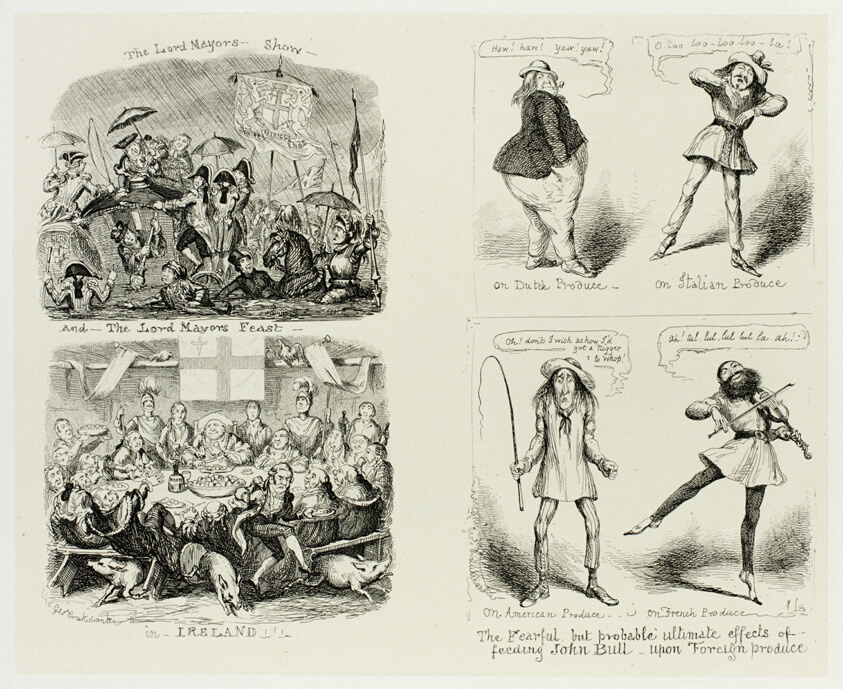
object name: Print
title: The Lord Mayors Show and the Lord Mayors Feast in Ireland from George Cruikshank's Steel Etchings to The Comic Almanacks: 1835-1853 (left)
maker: George Cruikshank (English, 1792-1878); published by Pickering & Chatto (English, 19th century)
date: 1850, printed c. 1880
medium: Two steel etchings in black on cream India paper, laid down on off-white card (chine collé)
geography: England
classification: print; prints and drawing